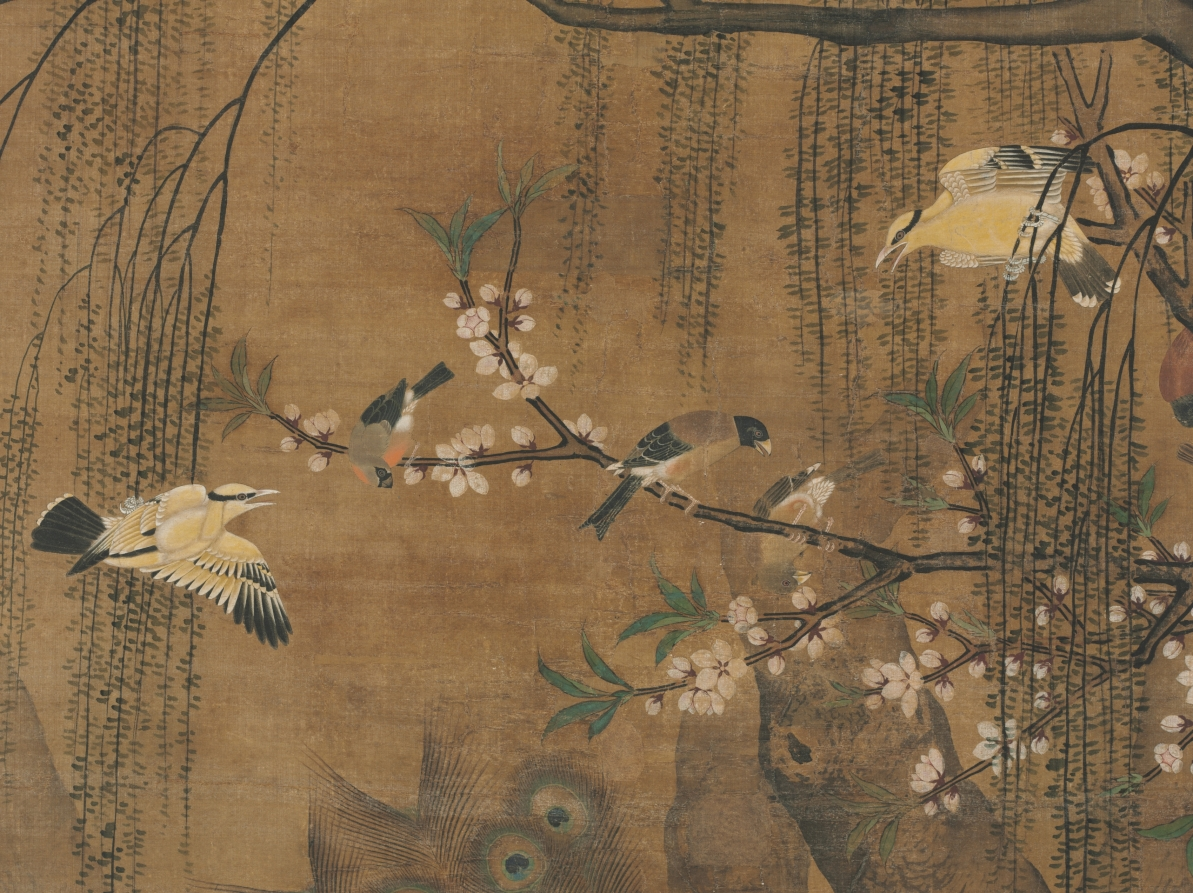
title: Birds Gather under the Spring Willow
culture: China, Ming dynasty (1368–1644)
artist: Yin Hong (Chinese, c. 1430-c. 1500)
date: late 1400s-early 1500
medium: hanging scroll, ink and color on silk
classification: Painting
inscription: 殷宏. [印]金臺世家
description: This scroll depicts a spring scene with all kinds of birds, including one peacock with a hen among peonies. The painting is one of four surviving works by Yin Hong bearing his signature and seals. Some scholars debate whether this work depicts the theme “One Hundred Birds admiring the Phoenix,” a metaphor for human society presenting an idealized hierarchy under imperial rule; other scholars argue that peafowls, as exotic birds not native to China, would not be depicted to represent the emperor. This large painting might have been hung in a palace hall and may have been part of a set depicting the four seasons.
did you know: The peahen is plucking a dandelion.